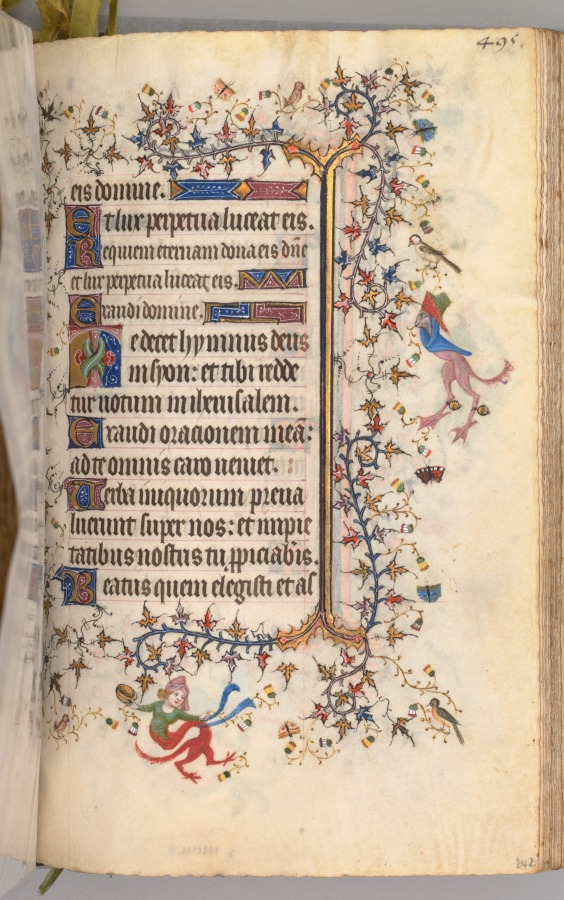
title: Hours of Charles the Noble, King of Navarre (1361-1425): fol. 242r, Text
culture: France, Paris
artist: Master of the Brussels Initials and Associates (French)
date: c. 1405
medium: ink, tempera, and gold on vellum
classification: Bound Volume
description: This precious volume was obviously highly prized by its owner, the French-born King of Navarre, who had his coat of arms painted on no less than twenty folios. Rather than directly commissioning this manuscript from a specific workshop, it seems that Charles the Noble acquired his book of hours -- perhaps ready-made for the luxury market -- while on a trip to Paris in 1404-05. A collaborative effort, six painting styles are evidenced within the pages of this codex, those of two Italians, two Frenchmen, and two Netherlanders. The painter who was responsible for the planning and decoration of the book, and who produced seventeen of the large miniatures, was a Bolognese artist known as the Master of the Brussels Initials. His principal assistant, responsible for most of the borders, was a Florentine who signed his name "Zecho" da Firenze on folio 208 verso.